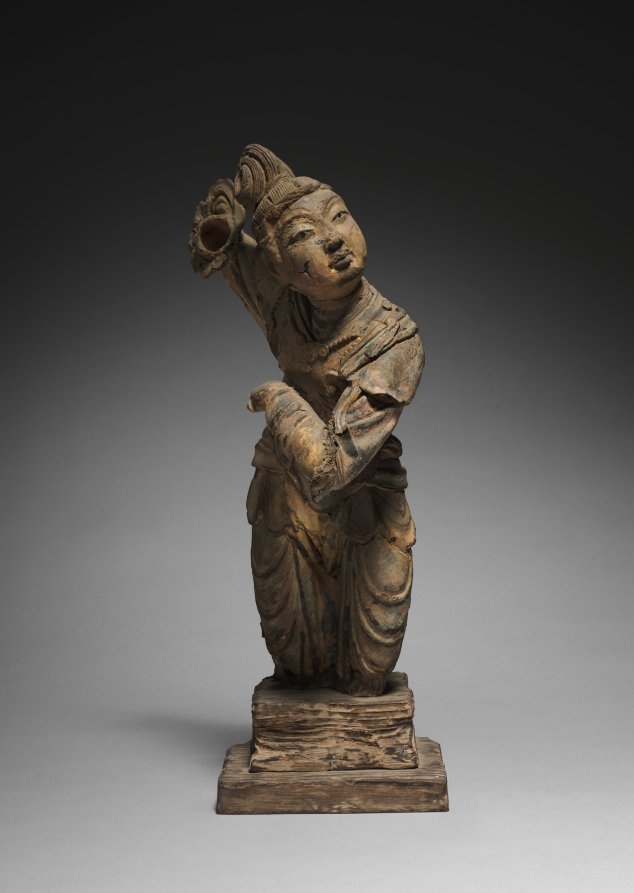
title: Dancing Apsaras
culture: China, late Tang dynasty (618–907) to Five dynasties (907–960)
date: 900s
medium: dry lacquer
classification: Sculpture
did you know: The sculpture was made from a rare technique involving alternate layers of cloth and lacquer, modeled on an armature or around a removable clay core.